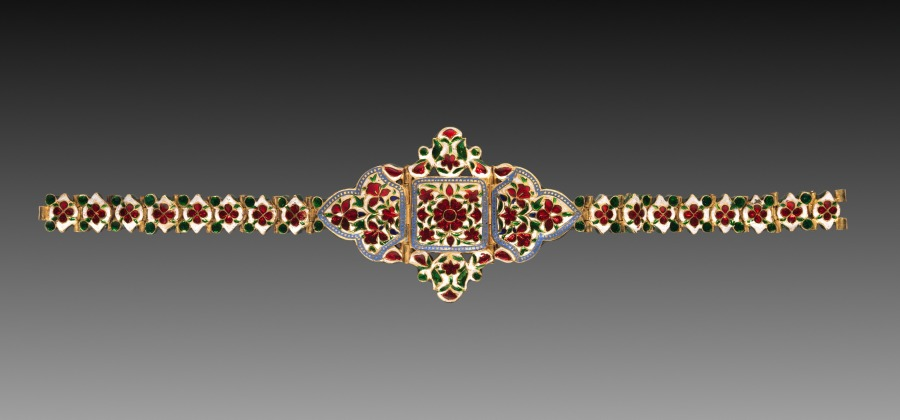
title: Bracelet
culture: India, Mughal, Rajasthan, Jaipur, 18th century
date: 1700s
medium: Gold, emeralds, diamonds, and enamel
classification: Jewelry